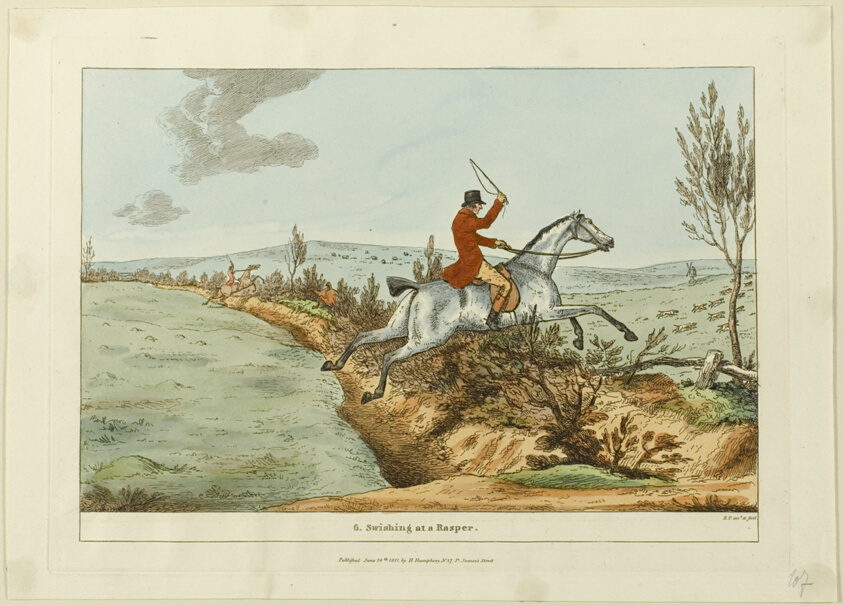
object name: Print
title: Swishing at a Rasper, plate six from Indispensable Accomplishments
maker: Sir Robert Frankland (English, 1784-1849); published by Hannah Humphrey (English, c. 1745-1818)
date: published June 24, 1811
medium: Hand-colored etching on paper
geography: England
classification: etching; print; prints and drawing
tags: dogs, animals